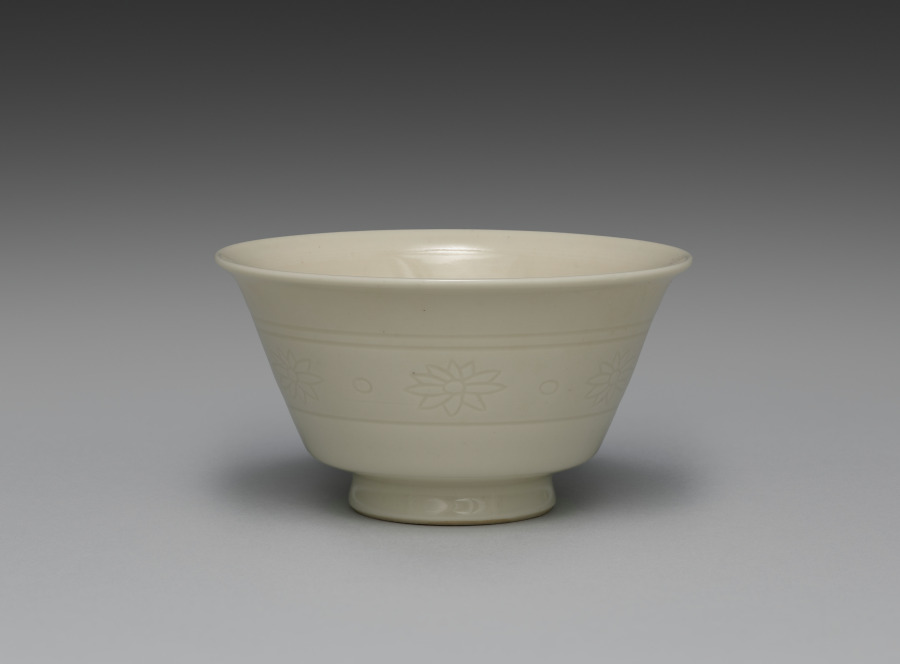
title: Teacup from Teacups with Floral Band Motif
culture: Japan, Meiji period (1868–1912)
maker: Seifū Yohei III (Japanese, 1851–1914)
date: 1893–1914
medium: One from a set of five cups; porcelain with incised decoration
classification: Ceramic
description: The five sencha teacups in this set are decorated with incised flowers and dots between a double band at the top and a single band at the bottom. They are in Yohei III’s creamy taihakuji body and glaze. In their motifs, they are quite similar to an incense burner by Yohei III (see CMA 2022.180), but the flowers are even more simple in design, with no open circle at the center. A label affixed to the side of the box refers to them as “sencha cups in emulation of Korean white [ware].” The reference to Korean ware indicates that even though Yohei was more directly inspired by Qing-dynasty wares from the Dehua kilns in Fujian Province in developing his porcelain clay and glaze for works such as these, the general understanding of the continental models still placed them, at least in terms of color, among pieces broadly associated in Japan with Korean white wares. The delicate cups are thinly potted, so they have a highly desirable translucency.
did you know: The delicate cups in this set are thinly potted, so they have a highly desirable translucency.